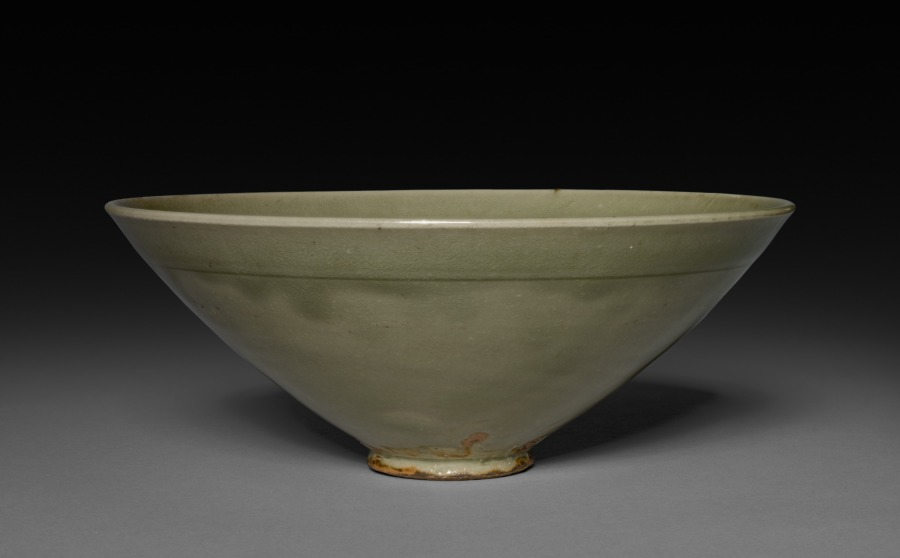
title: Bowl: Northern Celadon Ware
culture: China, Shaanxi or Henan province, Northern Song dynasty (960-1127)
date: 12th Century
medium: glazed stoneware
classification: Ceramic